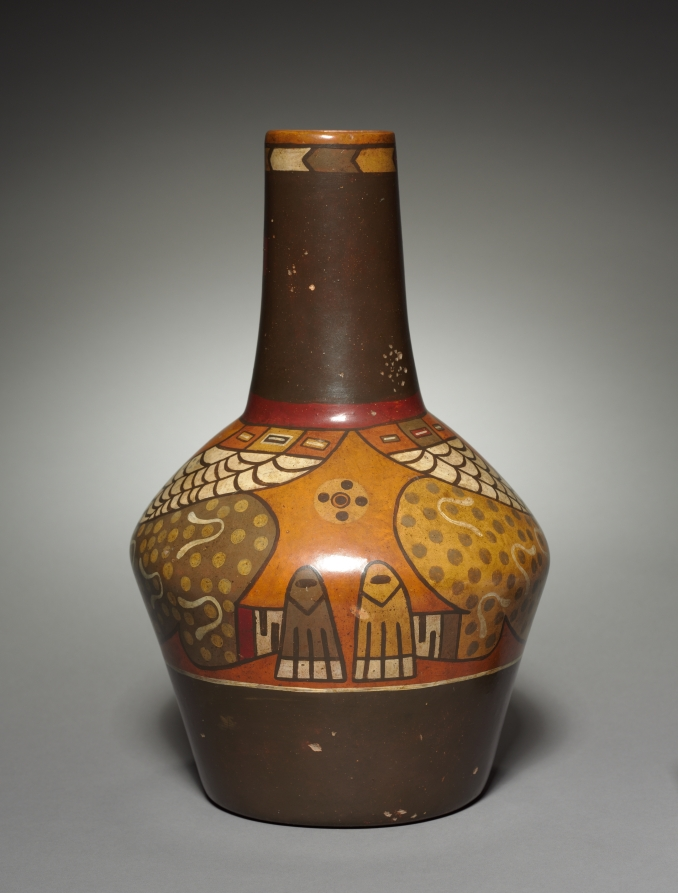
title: Vessel (modern version of a Wari-style vessel)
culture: Peru, modern, 20th century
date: before 1955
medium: pottery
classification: Forgery